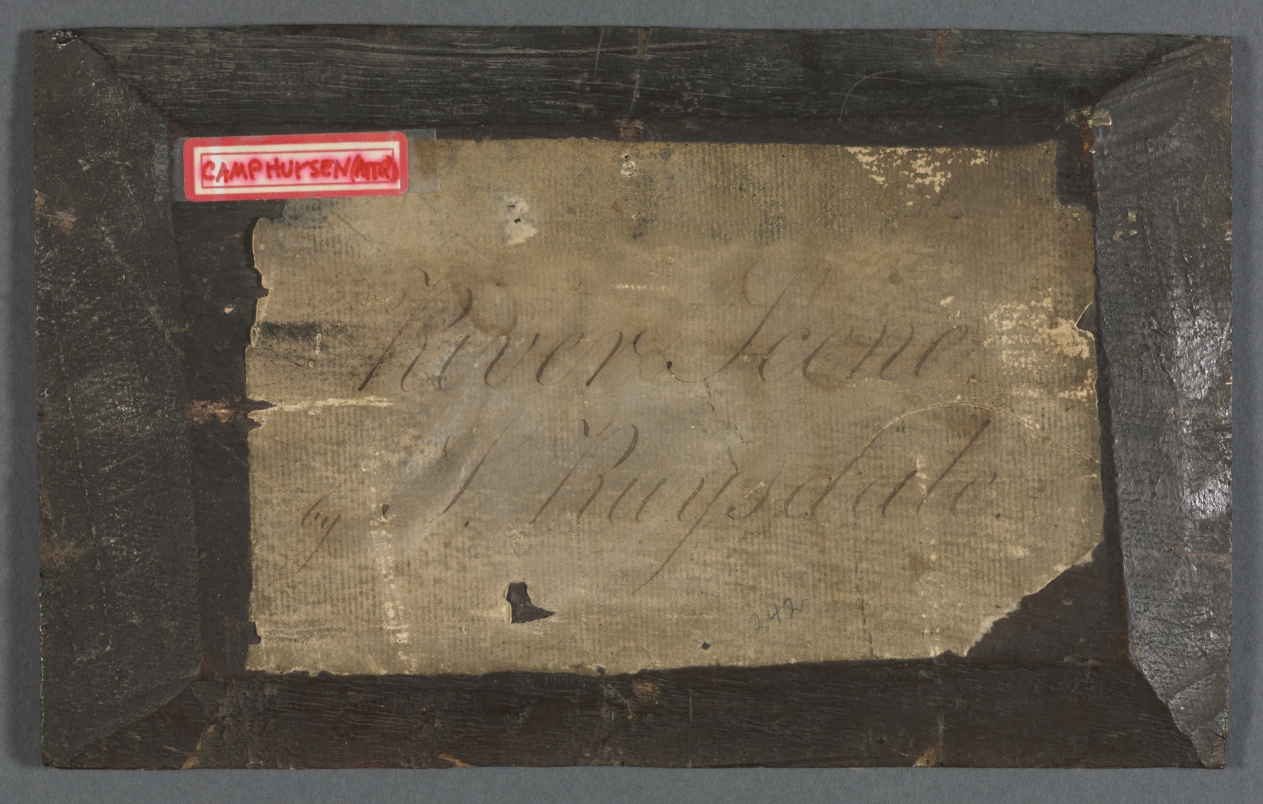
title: An Estuary Scene with Fisherman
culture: Netherlands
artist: attributed to Rafel Govertsz. Camphuysen (Dutch, 1597/98–1657)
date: 1625–50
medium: oil on wood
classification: Painting